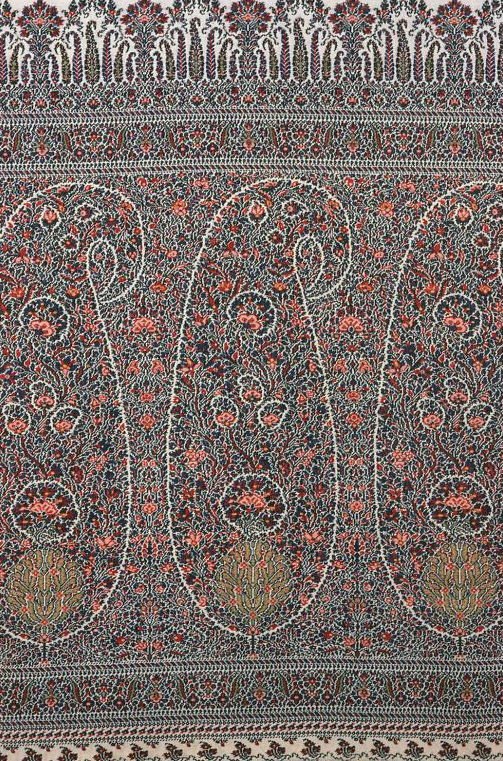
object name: Textile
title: Long Shawl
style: 19th century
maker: France or Scotland, Paisley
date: 1825/75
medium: Wool and silk, weft-float faced 1:3 'Z' twill weave with supplementary patterning wefts bound in weft-float faced 1:3 'Z' twill interlacings; main warp fringe; woven on loom with Jacquard attachment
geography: France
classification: costume accessory; weaving; textile; costume - weaving; costume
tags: paisley, fashion, floral motifs